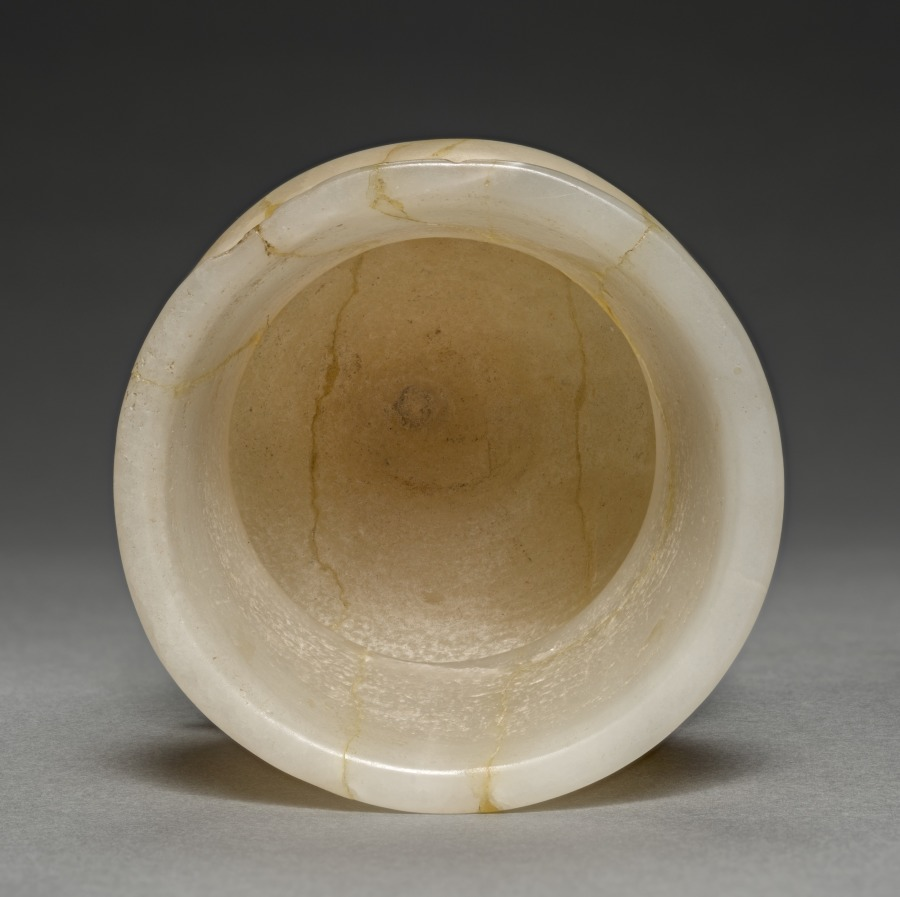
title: Long-Necked Flask (Krateriskos)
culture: Egypt, New Kingdom (1540–1069 BCE), Dynasty 18, reign of Tuthmosis III (1479–1425 BCE)–reign of Amenhotep III (1390–1352 BCE)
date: 1540–1296 BCE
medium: travertine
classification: Vessels